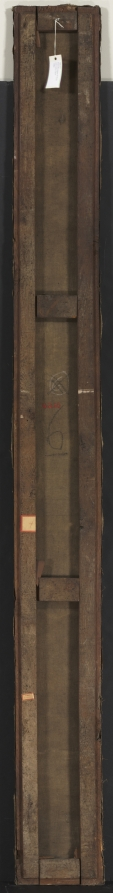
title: Decorative Panel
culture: France, 18th century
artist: Pierre Rousseau (French, 1751–1829)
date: 1790s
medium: oil on canvas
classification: Painting